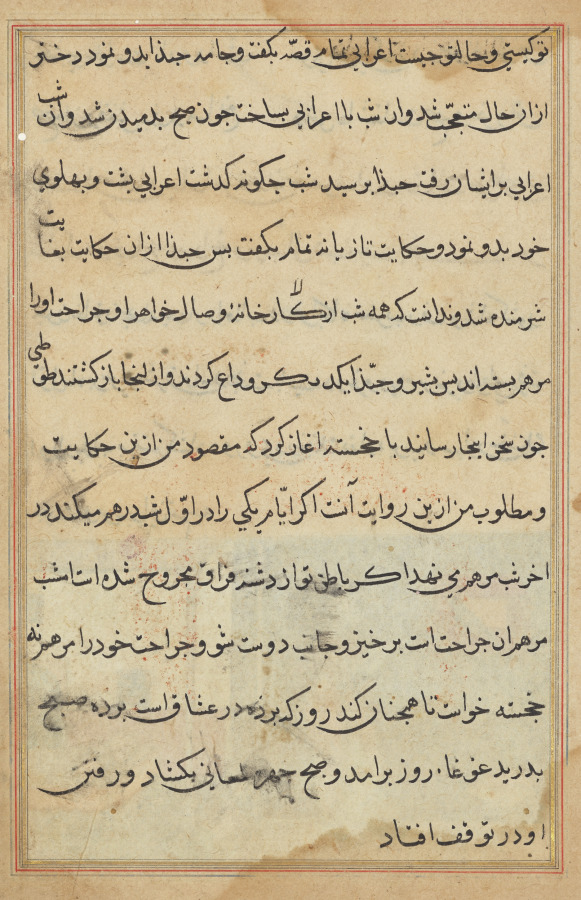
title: Page from Tales of a Parrot (Tuti-nama): text page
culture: Mughal India, court of Akbar (reigned 1556–1605)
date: c. 1560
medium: gum tempera, ink, and gold on paper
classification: Painting